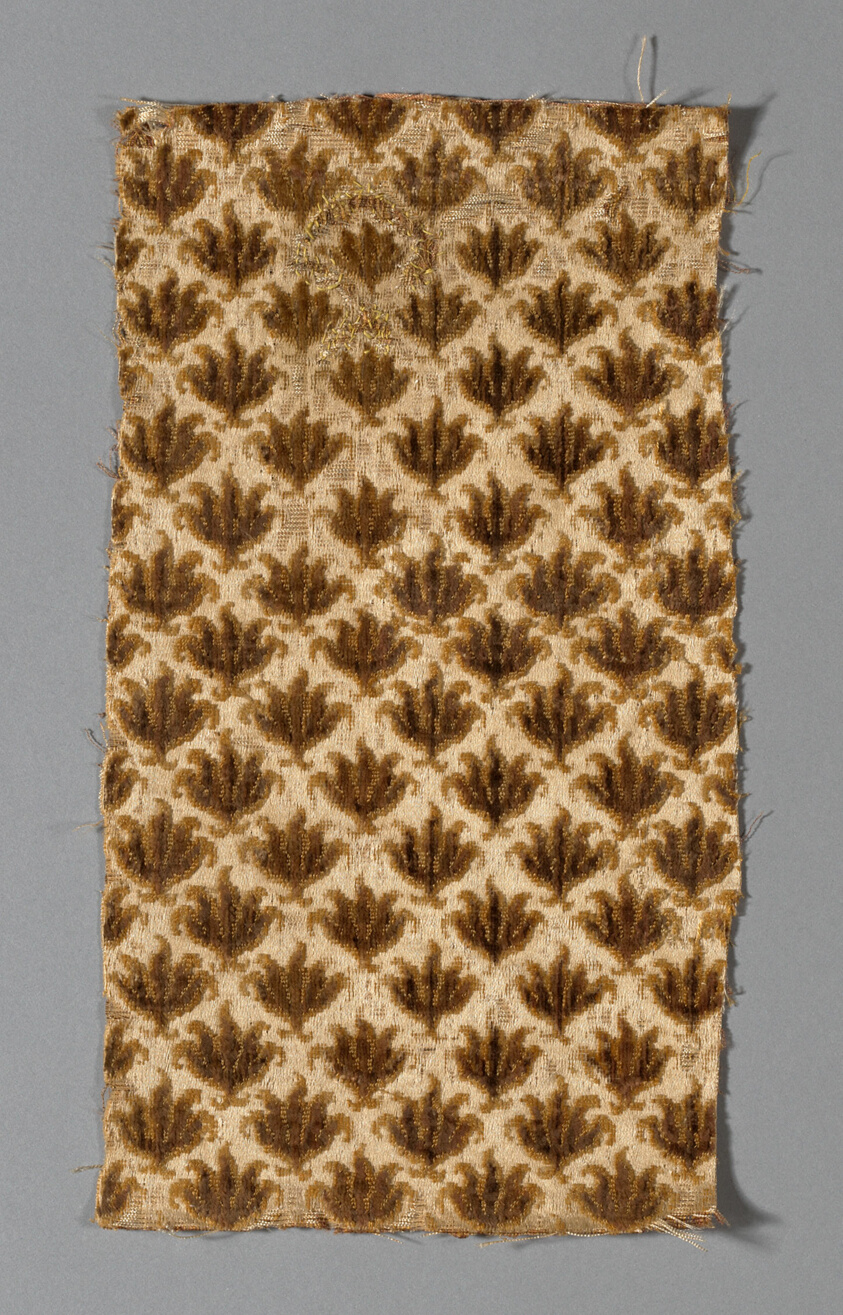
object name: Textile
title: Fragment (Dress Fabric)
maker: Possibly Italy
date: 1650/1700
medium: cisele voided satin velvet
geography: Italy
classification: textile; weaving - velvet; weaving